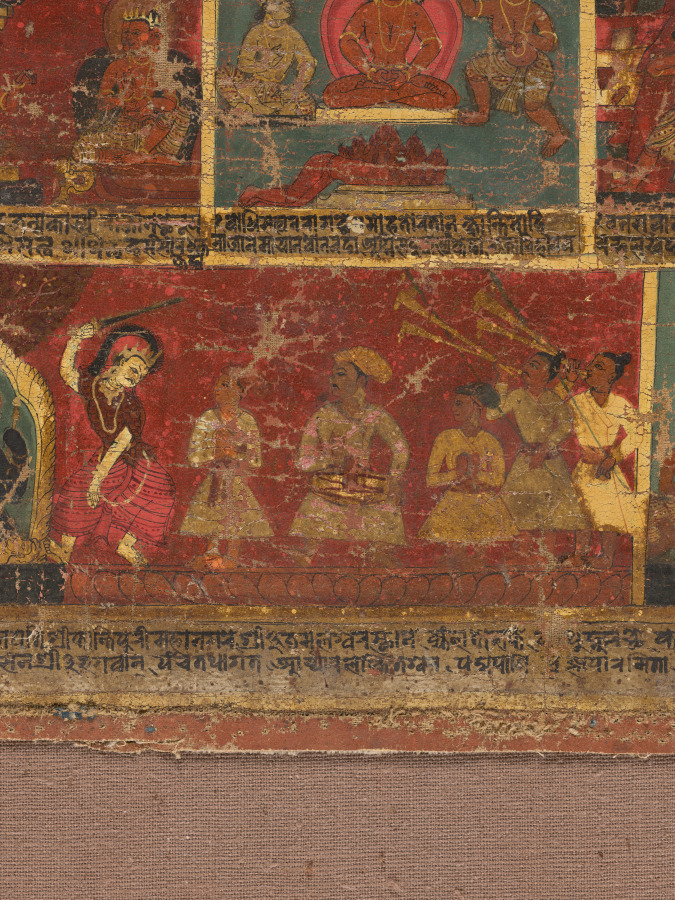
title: Bejeweled Buddha Preaching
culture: Nepal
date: 1648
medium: Gum tempera, ink, and gold on cloth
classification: Painting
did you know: Nepalese devotional paintings on cloth are called "paubha" in the Newari language.